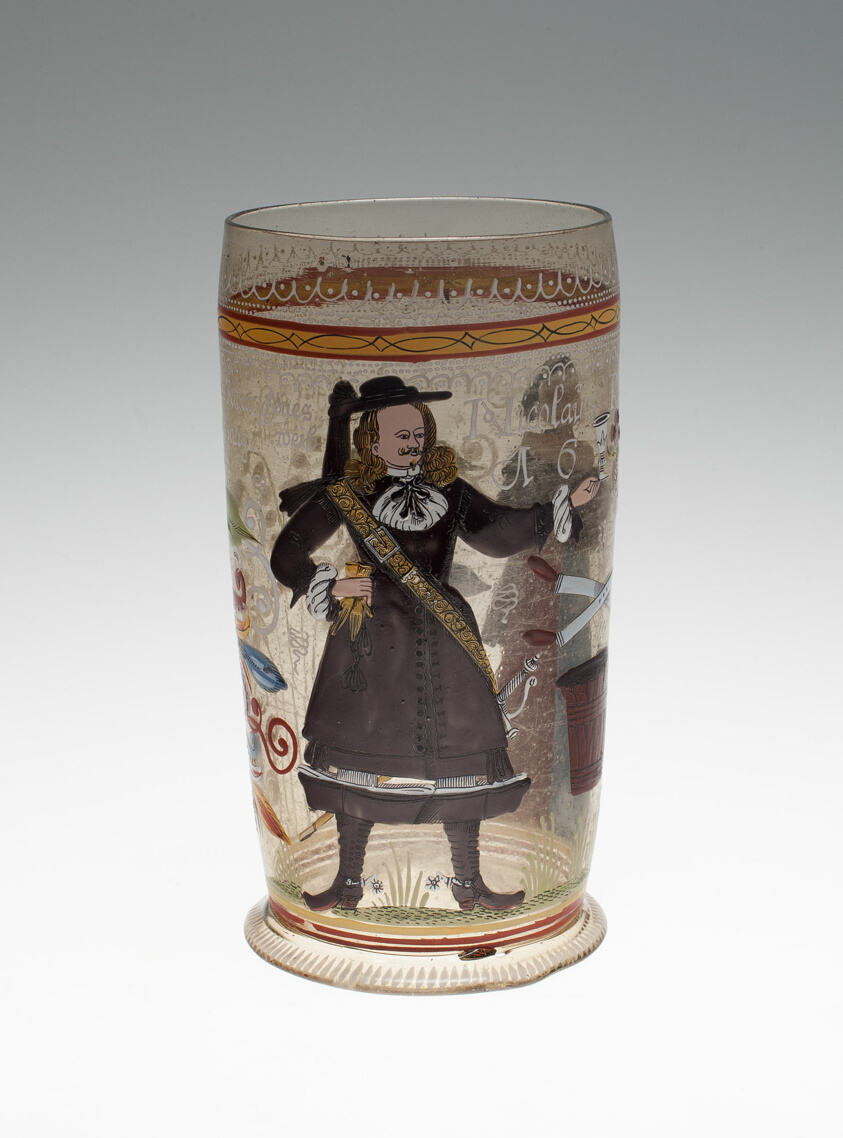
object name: Glass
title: Welcome Beaker (Wilkomm)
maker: Franconia, Germany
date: 1669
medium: Glass with enamel decoration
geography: Franconia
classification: drinking vessel; glass; european decorative arts